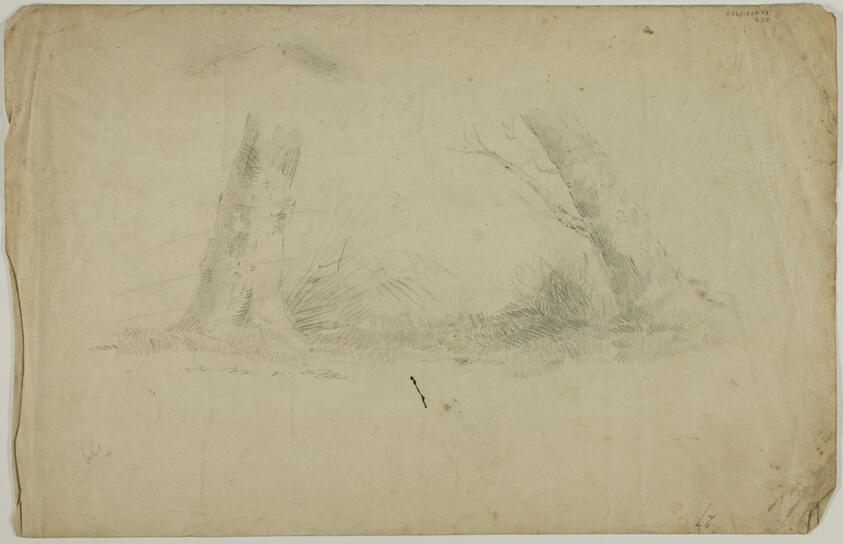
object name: Drawing and Watercolor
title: Blacksmith's Shop at Guildford (recto); Sketch of Two Tree Trunks (verso)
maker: George Wallwyn Shepheard (English, 1804-1852); or John Claude Nattes (English, c. 1765-1822); or circle of Joseph Powell (English, 1780-1834)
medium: Graphite with brush and brown wash (recto), and graphite (verso), on tan wove paper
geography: England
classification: ink or chalk wash; drawings (visual works); prints and drawing